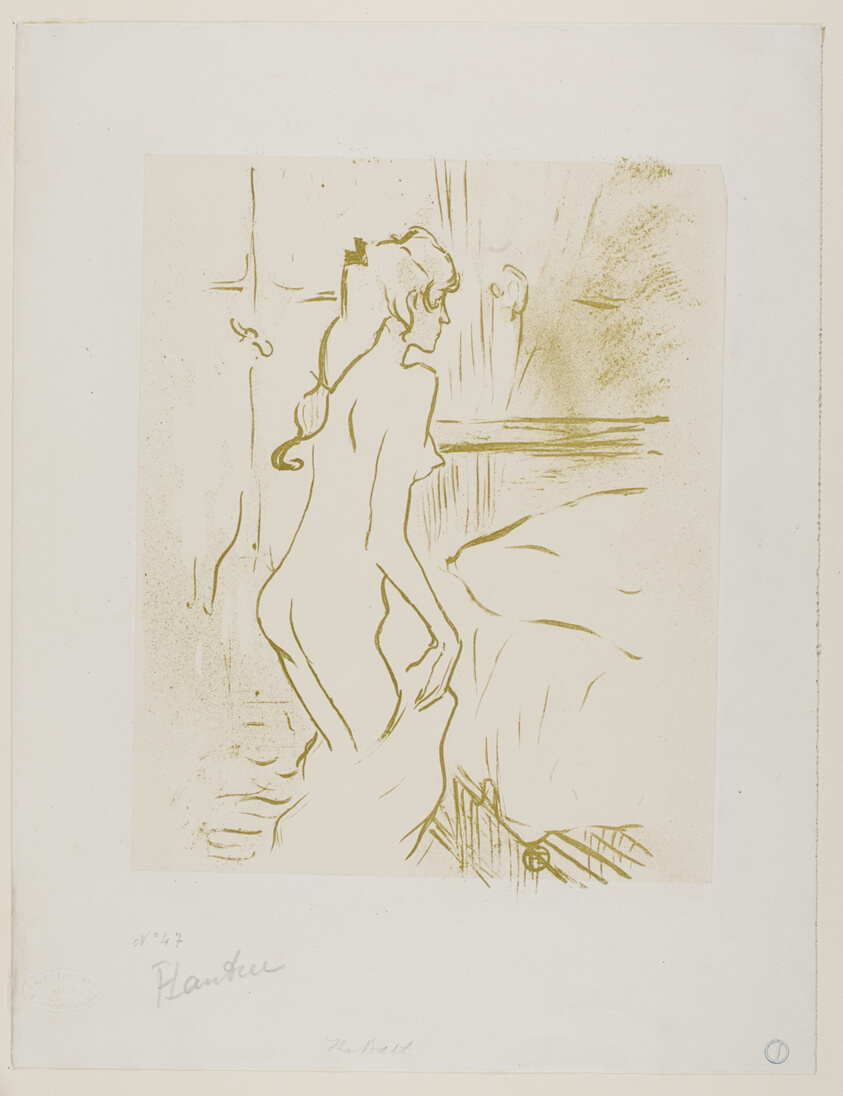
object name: Print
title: Study of a Woman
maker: Henri de Toulouse-Lautrec (French, 1864-1901)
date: 1893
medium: Color lithograph on cream wove paper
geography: France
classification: lithograph; print; prints and drawing